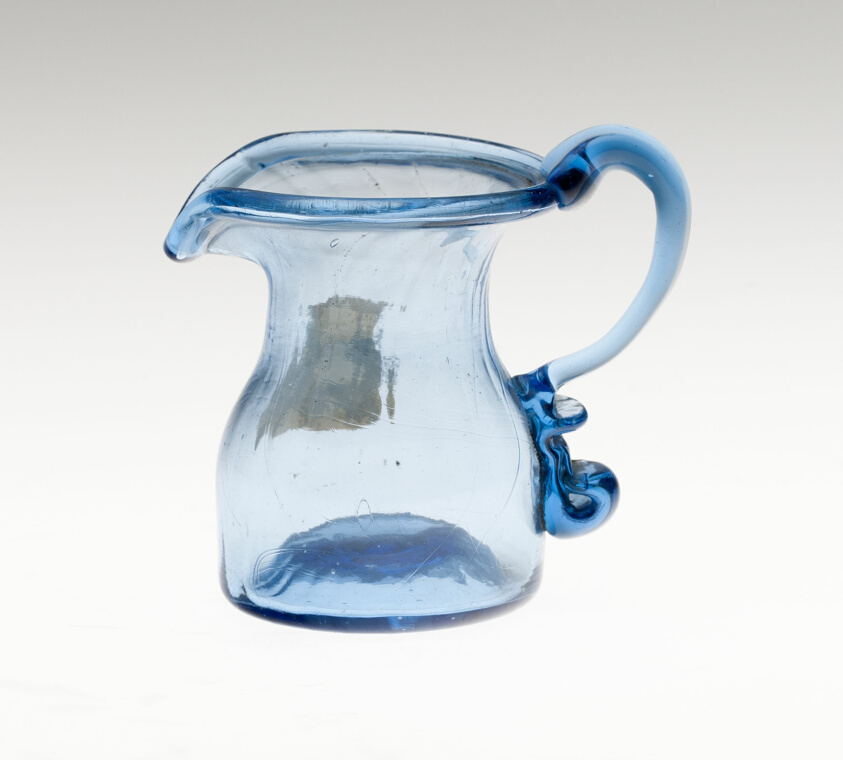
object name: Glass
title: Pitcher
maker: Italy, Venice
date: Possibly 18th century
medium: Glass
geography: Venice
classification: pitcher (vessel); glass; vessel; european decorative arts